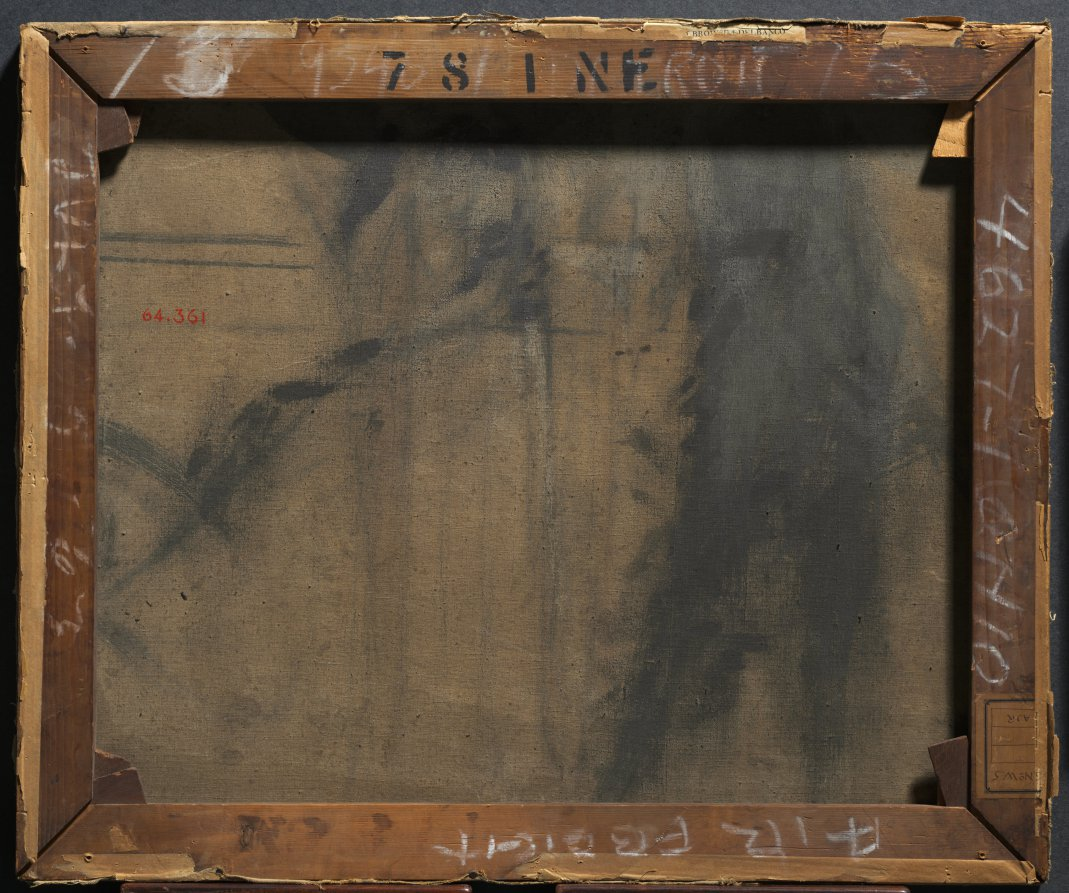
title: Gray and Silver: A Nocturne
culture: England, 19th century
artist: Walter Greaves (British, 1841–1930)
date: c. 1880–1900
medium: oil on canvas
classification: Painting